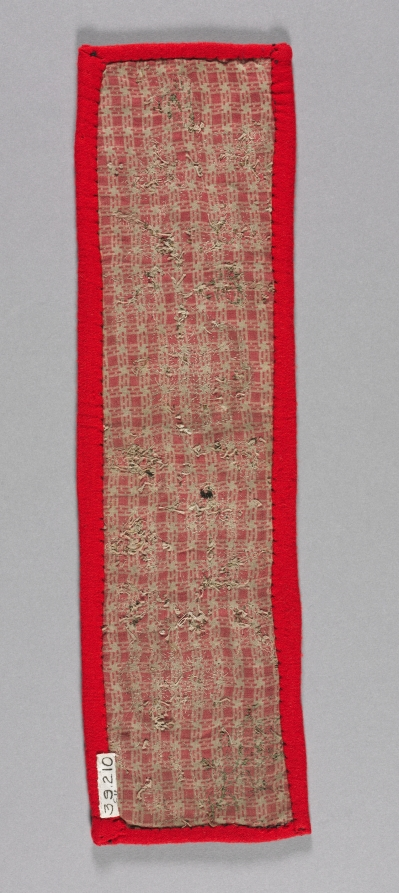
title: Two Beaded Panels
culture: Northeast Woodlands, Great Lakes Region, Anishinaabe (Ojibwe) or Nehiyawak (Cree) People?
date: late 1800s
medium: glass beads on wool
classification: Textile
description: In the 1800s, native peoples began to use European fabrics to fashion fine formal garments; they favored sturdy cloth, such as velvet and wool broadcloth, which provided support for heavy decorative beadwork that was added by hand. Often the fabric was a dark color, providing dramatic contrast for the multicolored beads. Rather than encrusting the entire garment, beadwork was confined to cuffs, “epaulettes,” bib-like plackets and yokes, rectangular panels sewn to leggings, shirts, and dresses, and the like.